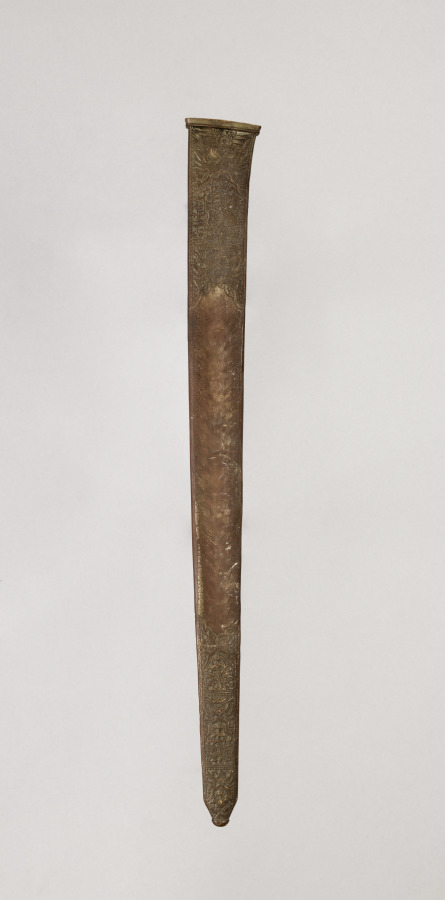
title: Scabbard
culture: Java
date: 1800s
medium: iron and silver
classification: Arms and Armor